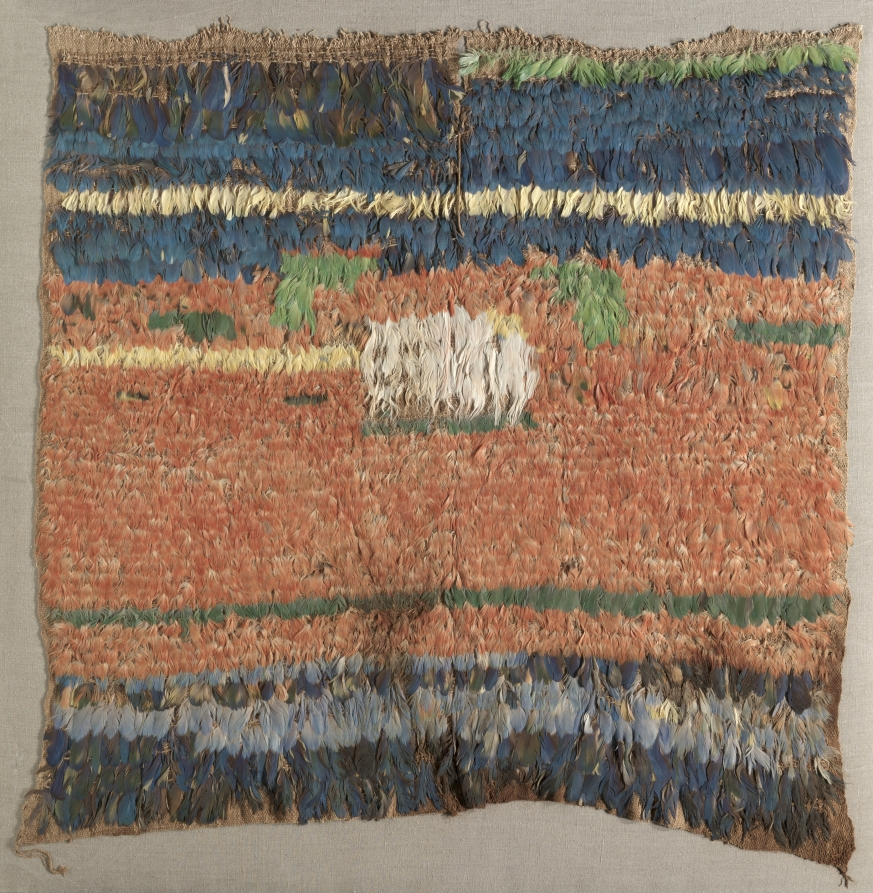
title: Feathered Tabard or Tunic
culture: Andes, 7th-15th century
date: 600–1500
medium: feather mosaic on cotton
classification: Textile